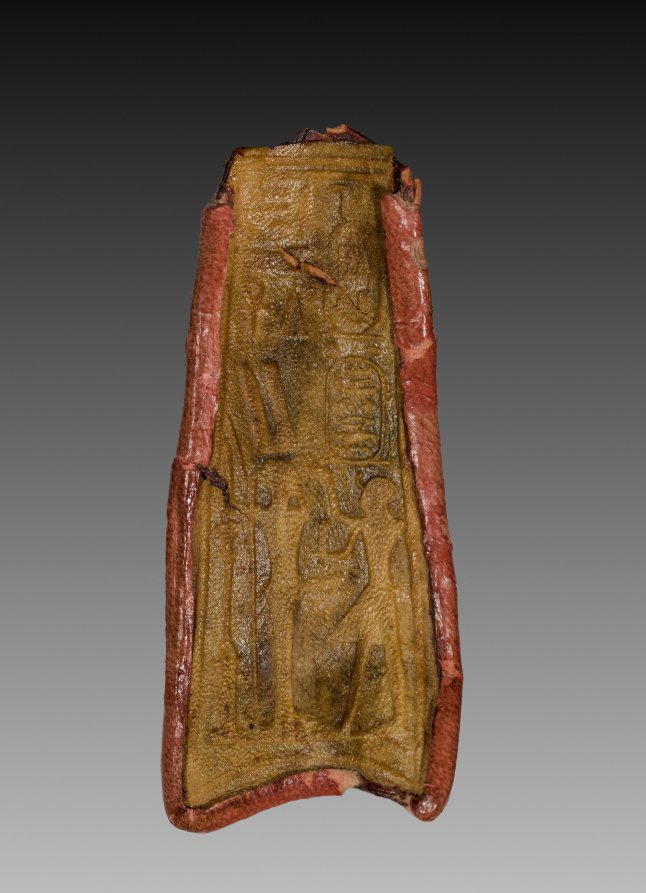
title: Tab from Mummy Band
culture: Egypt, Third Intermediate (1069–715 BCE), Dynasty 22, reign of Osorkon I (992–887 BCE)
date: 945–715 BCE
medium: stained leather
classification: Funerary Equipment